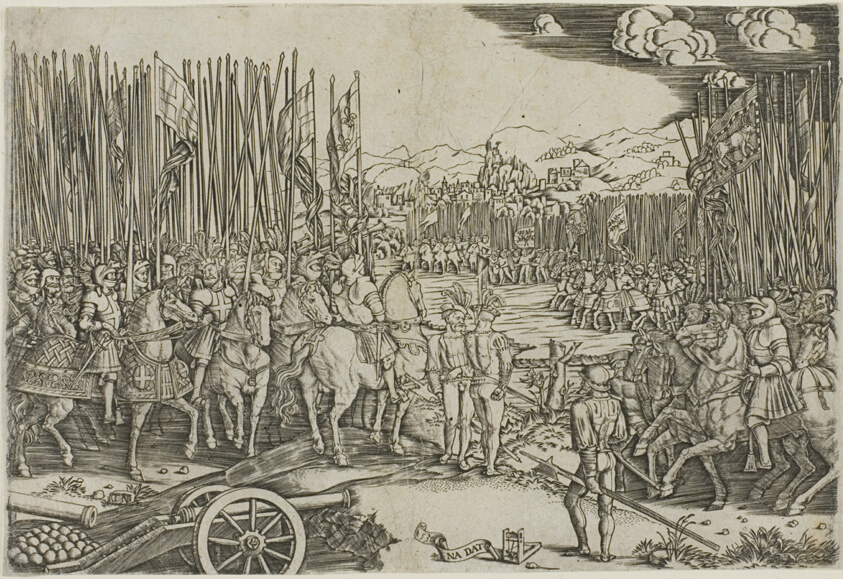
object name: Print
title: The Two Armies at the Battle of Ravenna, 1512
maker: Master with the Mousetrap; Italian, active c. 1500-after 1511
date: c. 1512, printed 1530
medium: Engraving in black on paper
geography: Italy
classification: engraving; print; prints and drawing